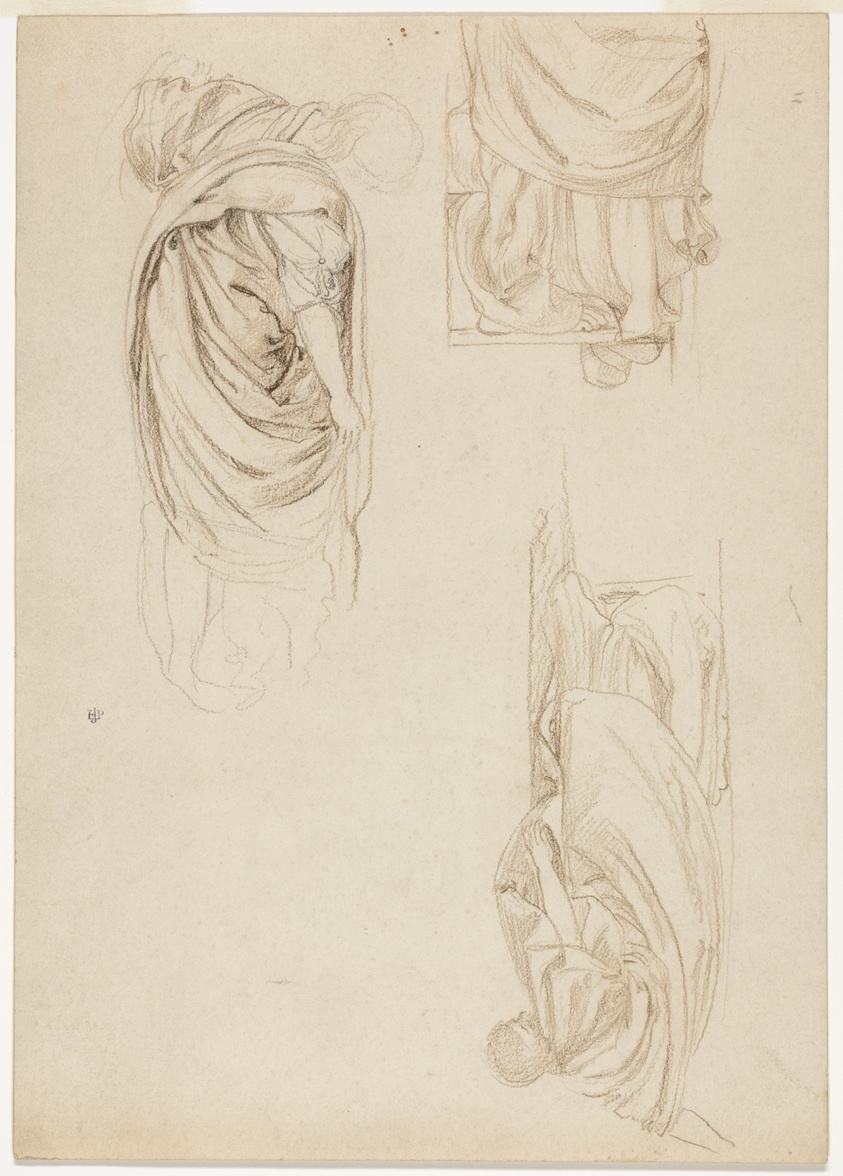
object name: Drawing and Watercolor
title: Study for Festival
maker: Sir Edward John Poynter; English, 1836-1919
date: c. 1875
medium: Brown and black chalks on cream wove paper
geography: England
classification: drawings (visual works); prints and drawing